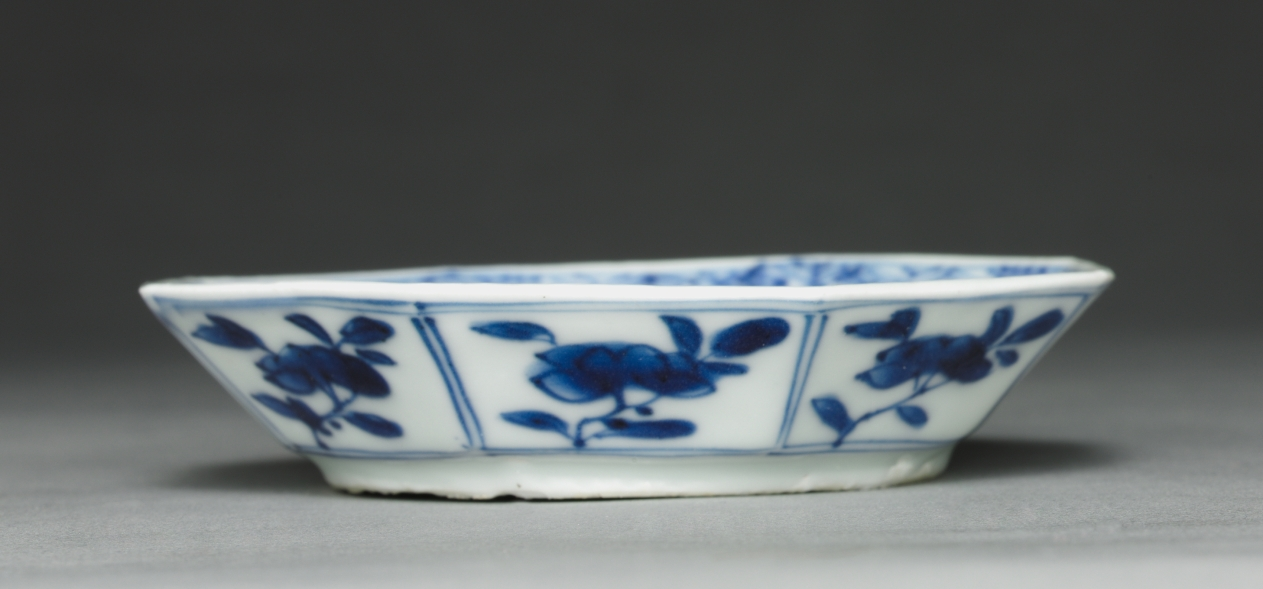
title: Saucer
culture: China, Qing dynasty (1644-1911)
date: c. 1690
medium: porcelain with blue and white decoration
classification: Ceramic